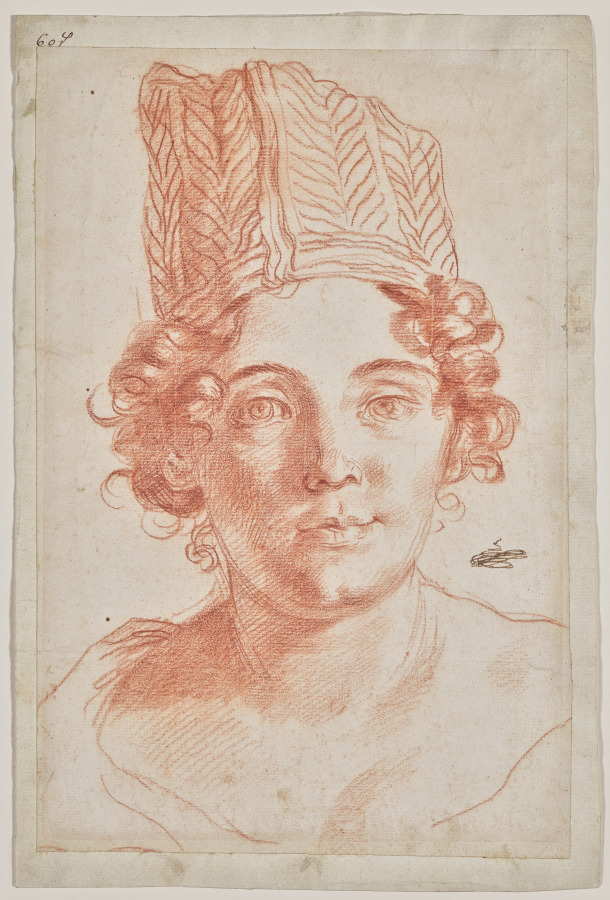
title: Portrait of Francesca Gommi, Wife of Carlo Maratti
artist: Carlo Maratti (Italian, 1625–1713)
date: c. 1670s-80s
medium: red chalk on paper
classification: Drawing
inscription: inscribed with paraph of Ignacio Augustin de Hermosilla Sandoval y Rojas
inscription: laid down on album sheet inscribed “60 R”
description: This portrait drawing by Carlo Maratti conveys the immediacy of being drawn while the artist looked directly at the sitter’s features. The sitter, Francesca Gommi, was Maratti’s mistress (later wife), who he also depicted in a formal portrait, now in the CMA’s collection (see 2018.1). This drawing, instead, depicts an intimate moment. Adding to the casual nature of the portrait, Gommi wears a whimsical rimless hat, which may be a sleeping cap.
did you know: The sitter of this portrait was the mistress of the artist and later his wife.